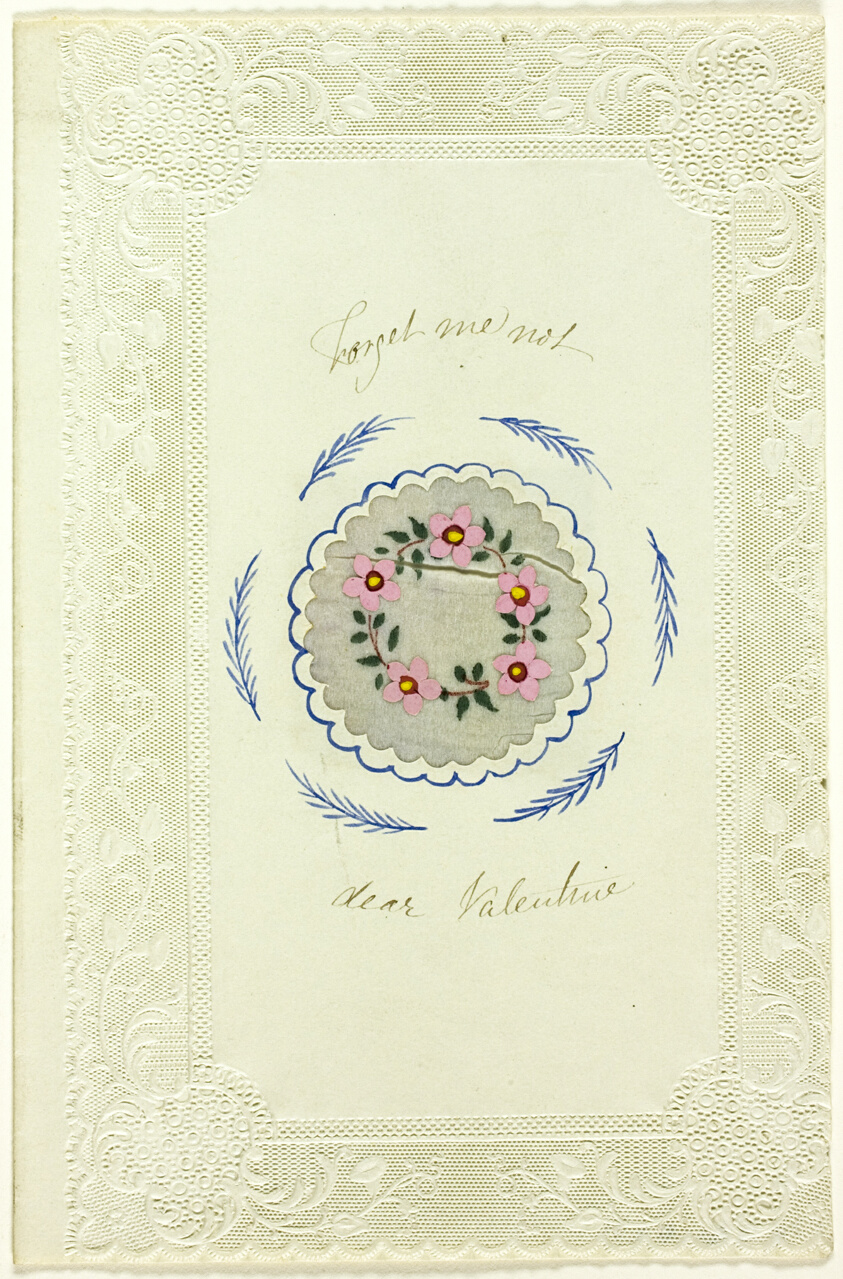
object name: Drawing and Watercolor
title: Forget Me Not Dear Valentine (valentine)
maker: Unknown Artist; English, 19th century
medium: Collaged elements and watercolor, with pen and brown ink on cut and embossed ivory wove paper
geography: England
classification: valentine; prints and drawing; paper